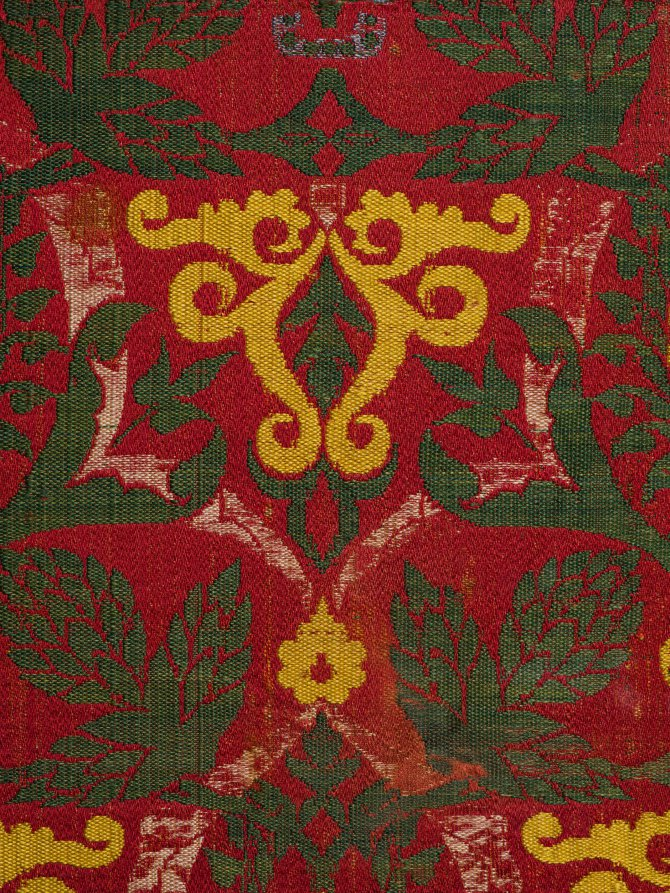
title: Fragment with curving vine and palmette leaves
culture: Spain, Granada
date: 1400s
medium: Silk: lampas weave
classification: Textile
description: The sophisticated combination of elements in this colorful fragment include large split palmette leaves in ivory silk framing yellow interlacing knots in a leafy surround. Prominent floral buds are arranged with dynamic effect in staggered rows. Foral motifs became increasingly prominent on textiles during the 1400s, supplanting geometric patterns.